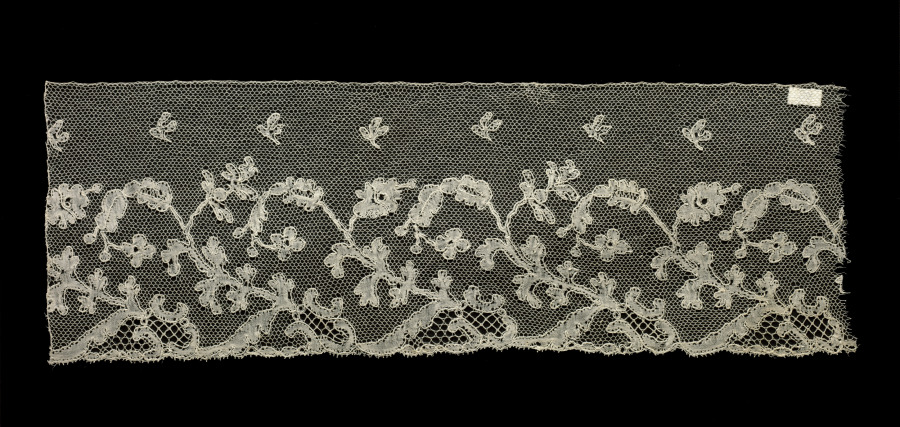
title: Lace Edging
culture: England, Northhamptonshire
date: 1800s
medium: Linen: bobbin lace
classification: Lace